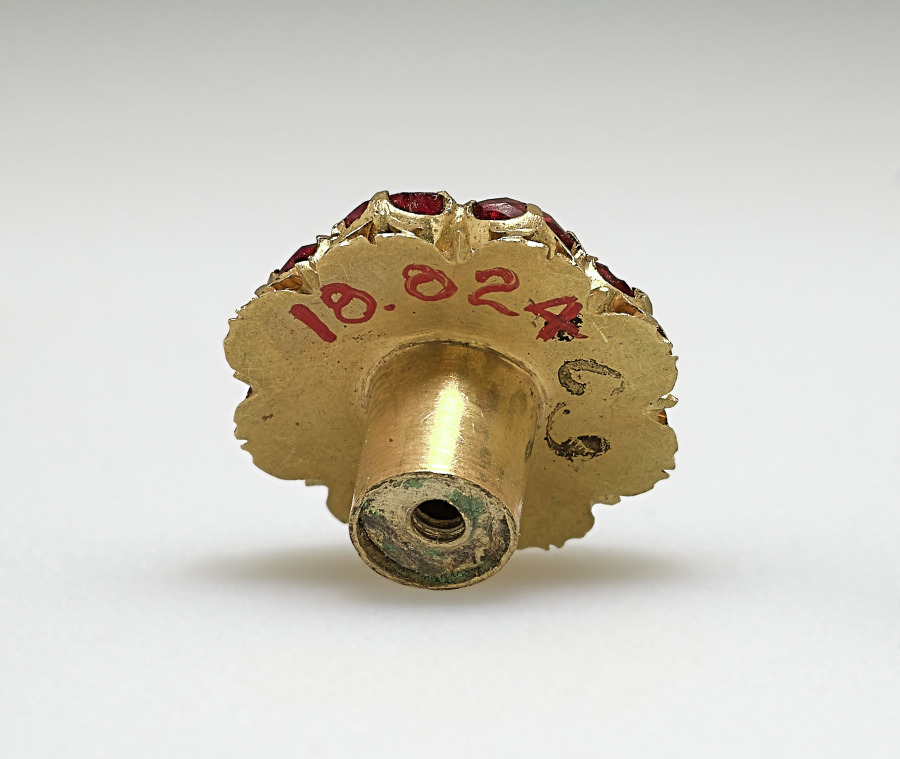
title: Earring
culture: Burma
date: 1800s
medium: gold and rubies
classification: Jewelry